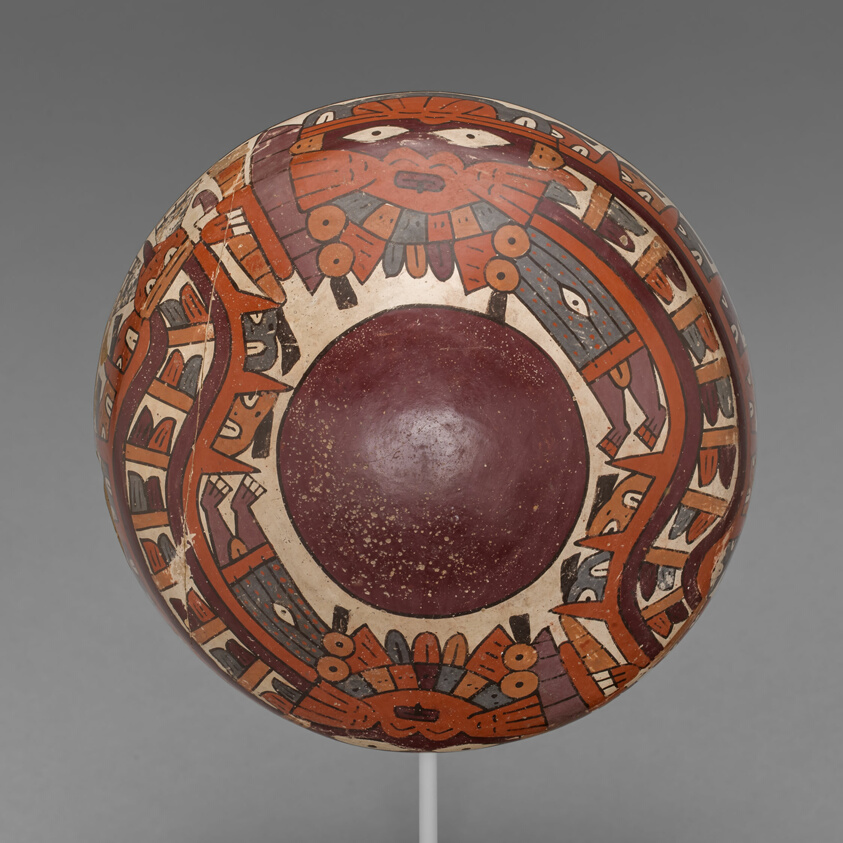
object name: Vessel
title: One of a Pair of Matched Bowls Depicting Costumed Ritual Performers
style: nazca, early intermediate period, Pre-Columbian, americas, andes, Arts of the Americas, andean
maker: Nazca; South coast, Peru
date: 180 BCE–500 CE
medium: Ceramic and pigment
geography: Peru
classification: bowl; earthenware; art of the americas; ceramics; vessel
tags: abstract figures, agriculture, costumed performer, anthropomorphic figure, ritual performer